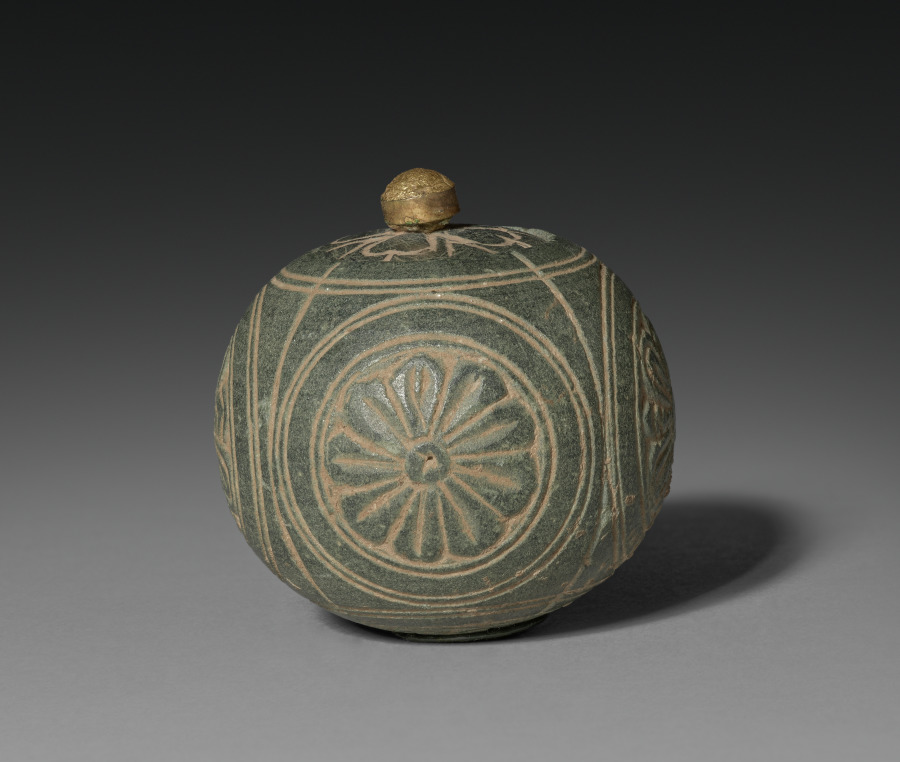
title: Miniature Stone Reliquary or Toilette Casket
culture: Pakistan, Gandhara, probably Sirkap, early Kushan period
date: 1–100 CE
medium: gray schist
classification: Sculpture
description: Tiny reliquaries holding the cremated remains of the Buddha or a high-ranking holy person empowered monuments and made them sacred. A Buddhist monument, such as the solid hemispherical mounds called stupas, would not be worshipped until it was consecrated with the relic secreted inside. Bits of ash were combined with tiny gems inside a crystal or glass reliquary, which was then placed inside a stone or metal container, like the lidded versions seen here. These containers look like cosmetic vessels for aromatic pastes used for perfume in ancient India. Buddhist texts state that the enlightened Buddha emitted a fragrance like sandalwood paste; the form of the reliquary as a perfume bottle indicates the presence of the Buddha by the visual reference to his pleasant scent. Once enclosed in the stupa the reliquaries would not be seen, but monks were tasked with applying sandalwood paste to the exterior of stupas as part of their regular maintenance to convey to visitors the ongoing presence of the Buddha radiating from the relic in the center.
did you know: The knob of the lid is gilded, as is the interior of the casket.